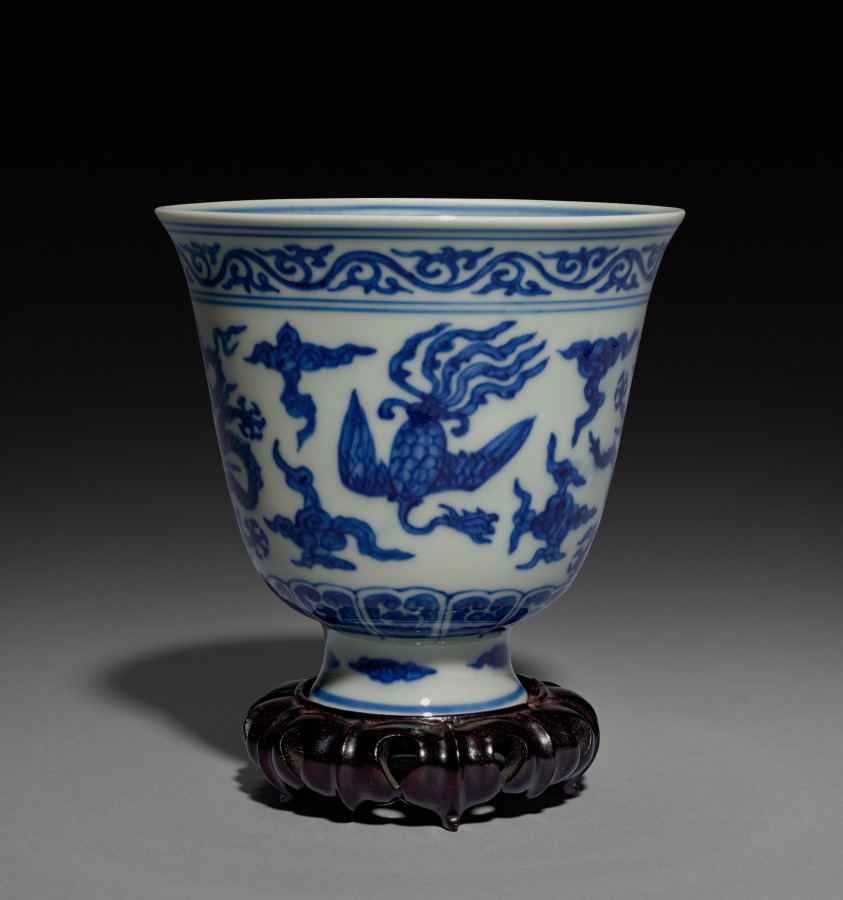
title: Cup with Dragons and Phoenixes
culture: China, Jiangxi province, Jingdezhen kilns, Ming dynasty (1368-1644), Jiajing mark and reign (1522-66)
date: 1522–66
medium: porcelain with underglaze blue decoration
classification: Ceramic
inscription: 大明嘉靖年製